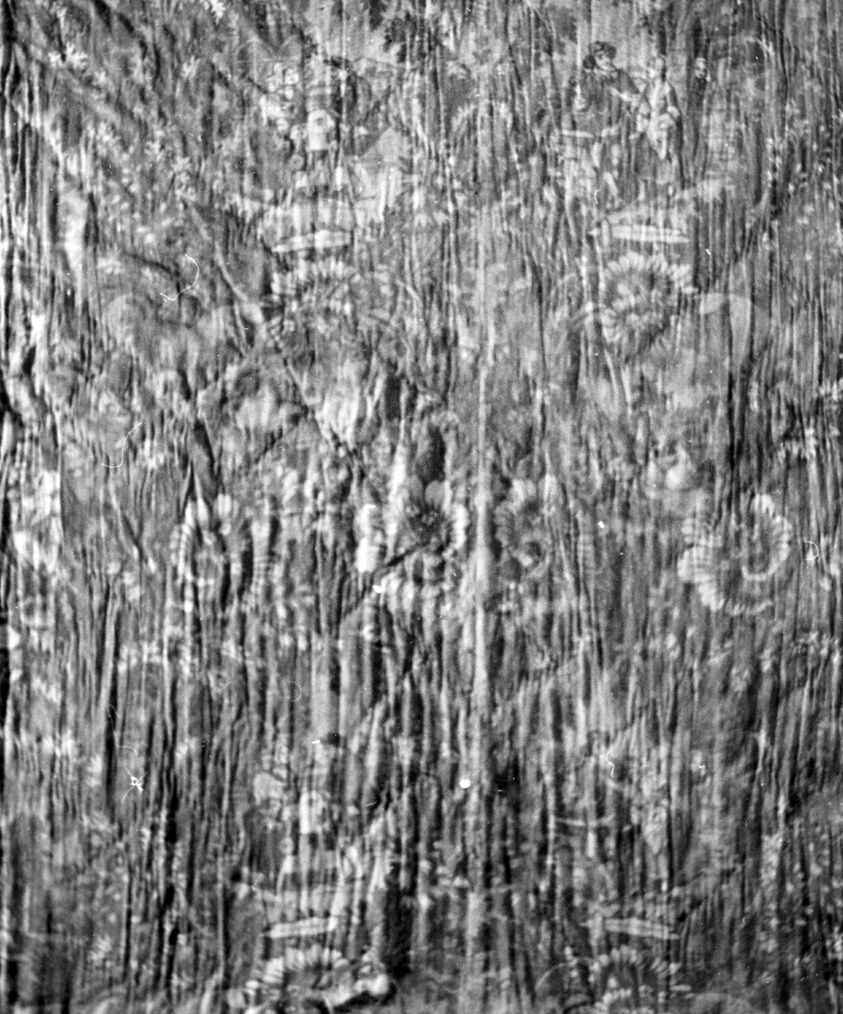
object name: Textile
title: Bedspread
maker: France, Nantes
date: Late 18th century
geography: Nantes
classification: textile; weaving - printed